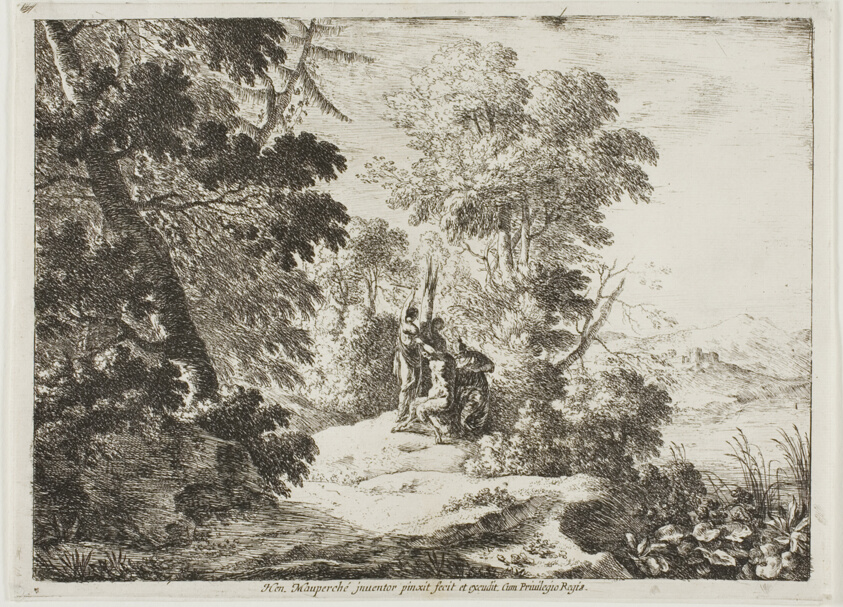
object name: Print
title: Flaying of Marsyas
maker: Henri Mauperché (French, 1602-1686)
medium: Etching on ivory laid paper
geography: France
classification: etching; print; prints and drawing